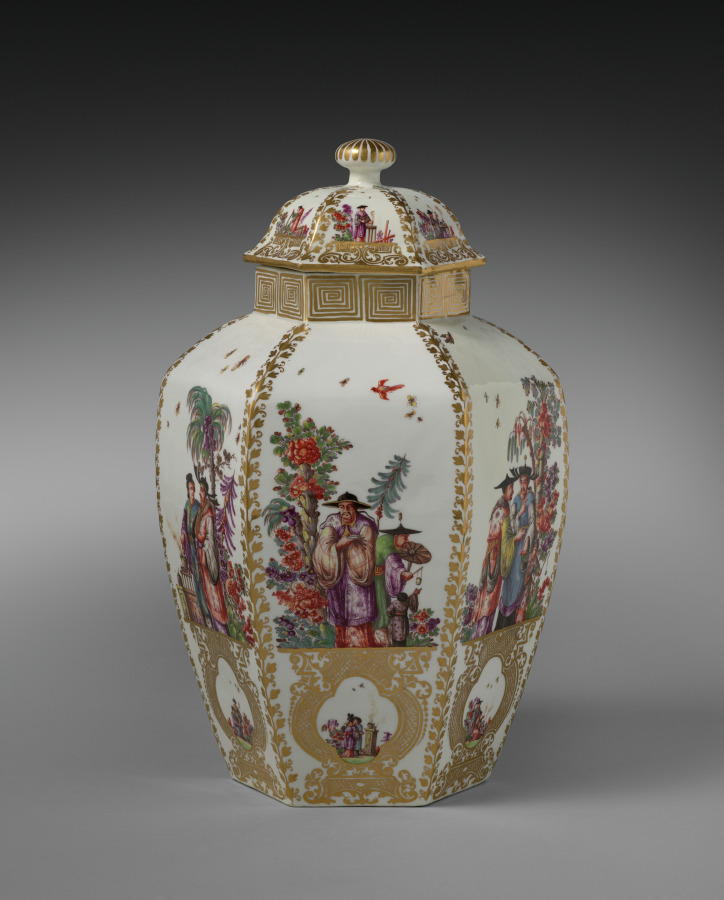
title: Covered Vase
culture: Germany, Meissen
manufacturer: Meissen Porcelain Factory (German, est. c. 1710)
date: c. 1728–30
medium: porcelain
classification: Ceramic